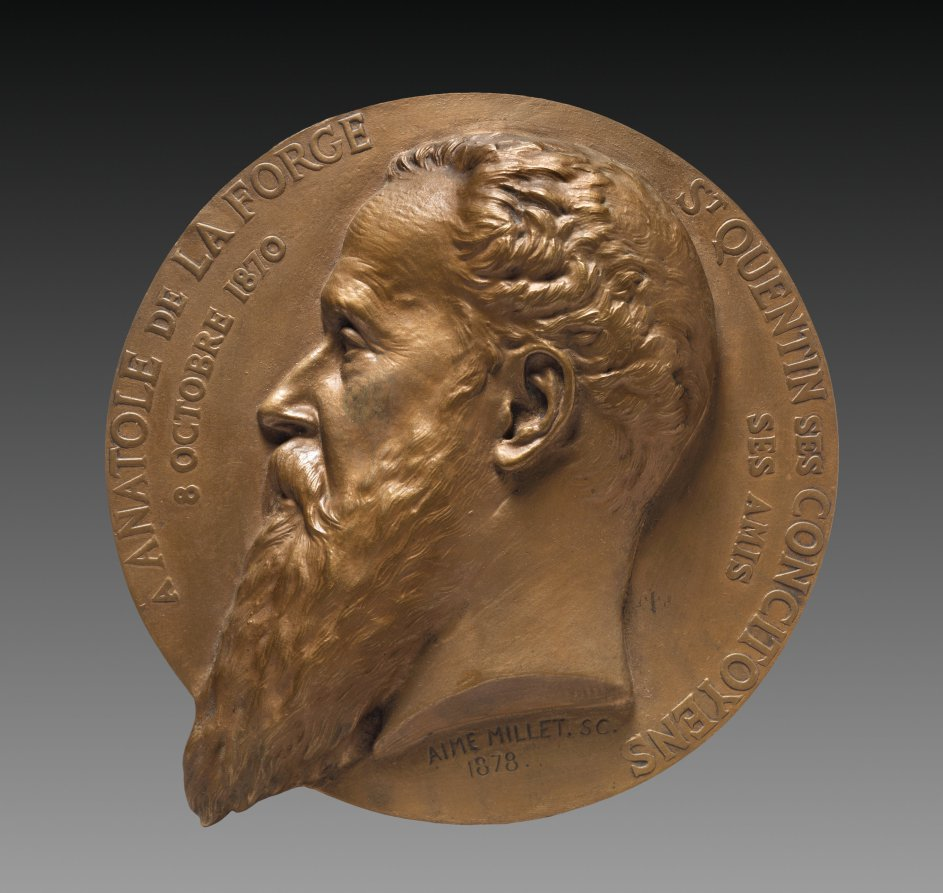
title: Portrait of Anatole La Forge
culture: France, 19th century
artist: Aimé Millet (French, 1819–1891)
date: 1878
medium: bronze relief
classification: Sculpture